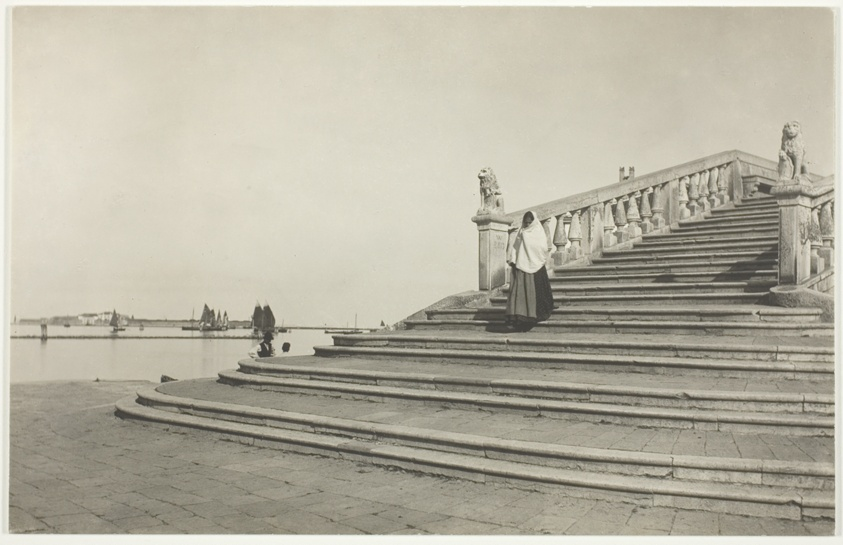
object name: Photograph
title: Stones of Venice, Chioggia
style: Pictorialism, 19th century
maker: Alfred Stieglitz (American, 1864–1946)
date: 1887, printed 1920/39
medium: Gelatin silver print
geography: United States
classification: gelatin silver (developing-out-paper) pr; photographic process; photography; photograph